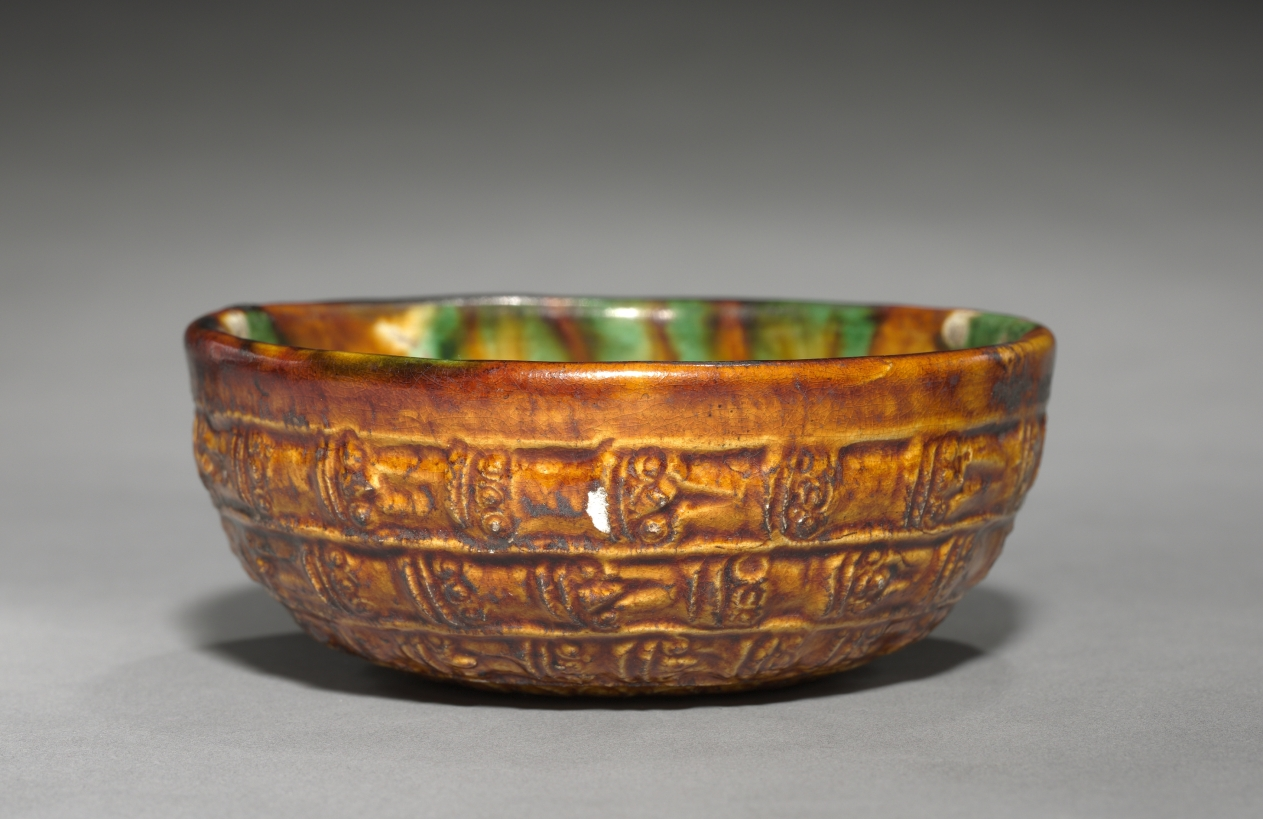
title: Bowl with Bands and Spirals in Relief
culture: China, Tang dynasty (618-907)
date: late 600s–early 800s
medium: glazed earthenware with molded decoration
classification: Ceramic